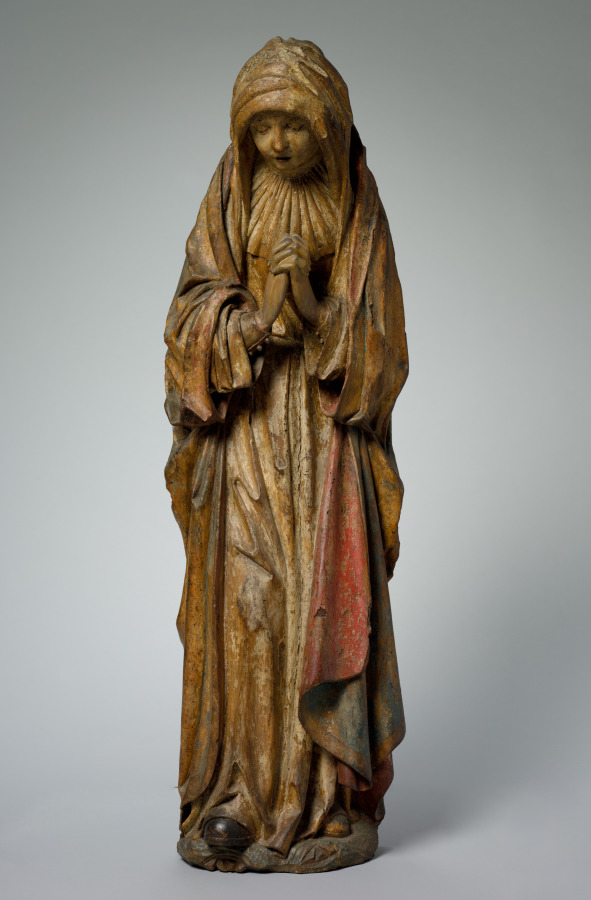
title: Virgin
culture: France, Champagne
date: 1510–15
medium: painted oak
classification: Sculpture